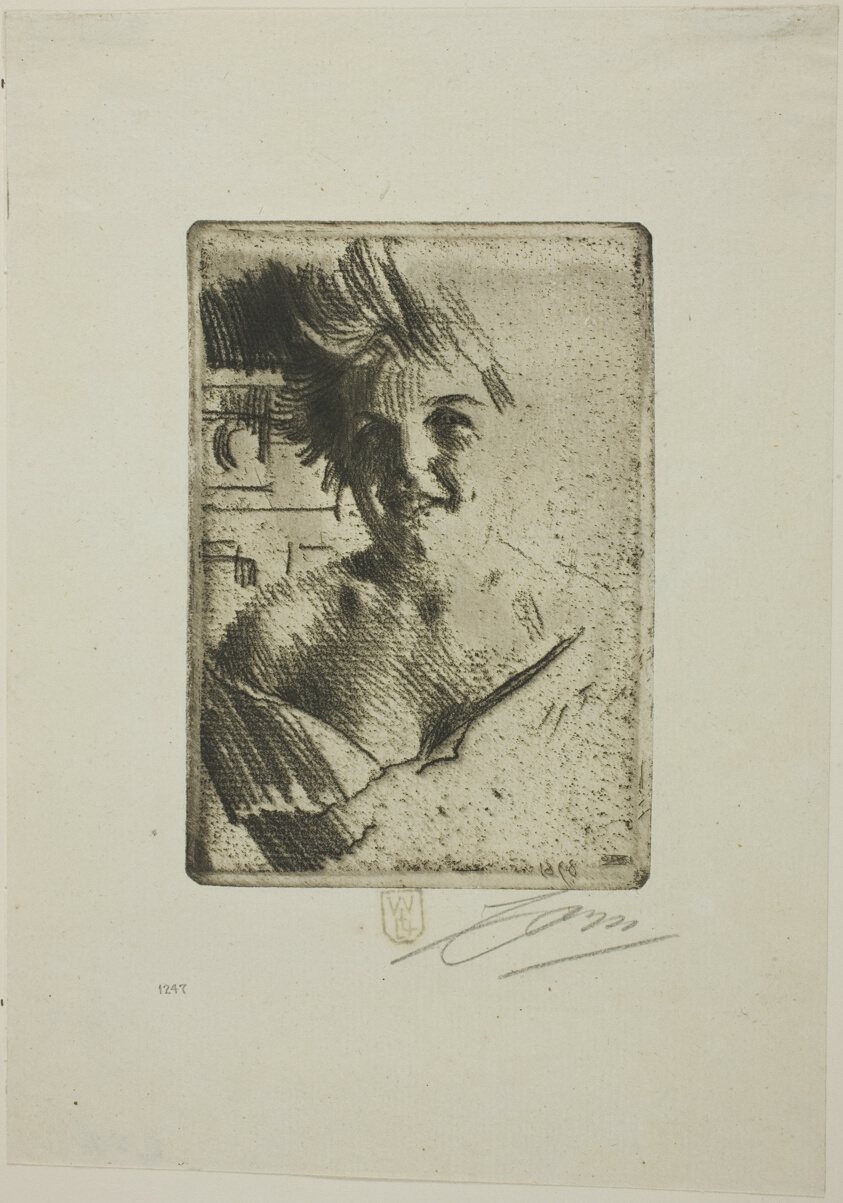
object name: Print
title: Laughing Model I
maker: Anders Zorn (Swedish, 1860-1920)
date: 1898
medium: Soft ground etching on ivory laid paper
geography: Sweden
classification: etching; print; prints and drawing